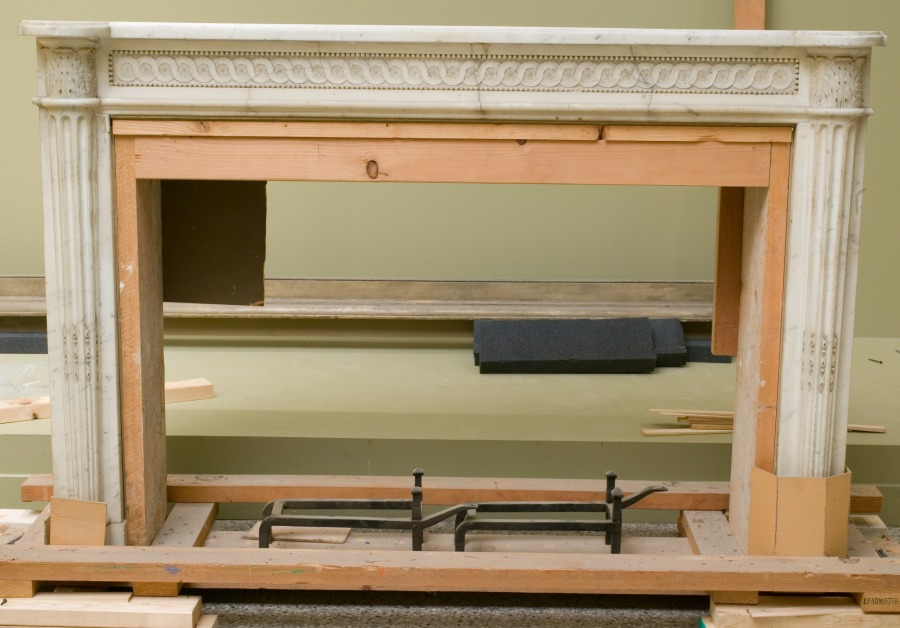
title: Mantel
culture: France, style of Louis XVI, 18th Century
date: c. 1770–1790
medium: marble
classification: Furniture and woodwork